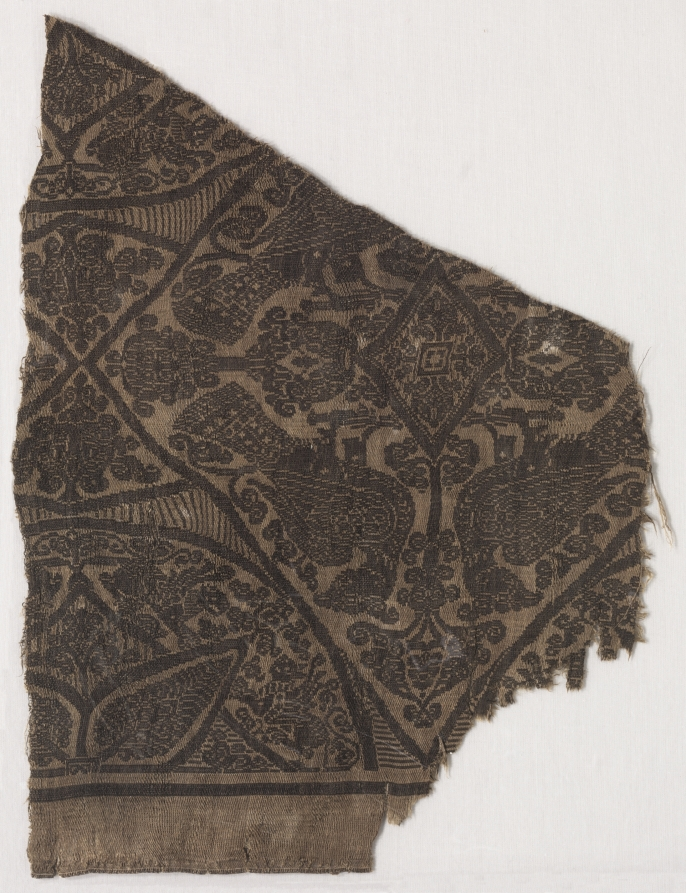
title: Fragment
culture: Iran or Iraq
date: 1420–1955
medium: Silk: compound twill weave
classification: Textile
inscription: sana'ahu 'Ali bin Yusuf bin al-Marzuban al-...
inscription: li-yasta 'malhu al-amir al-ajall Qawam al-Mulk Abu 'Abd Allah 'Isa bin Ibrahim al-Harithi atala Allah fi al-m'ali baqa['a]hu wa-harasa fi iqtifa[']al-makarim fana['a]hu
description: The weave provides different design for each side. On the front, the overall lozenge pattern has alternating rows of ornamented ovals and diamonds. The large diamonds have a large four-leaved motif super-imposed over a diamond with trees in each corner. The foliate ground with four pairs of opposed griffins fills the interspaces to the oval border. The diamonds have two opposed pairs of birds each flanking a Tree of Life and standing on a plant motif; these enclose a smaller central diamond with trees in each corner and a central square. On the reverse, the plain ground of natural tan has two brown bands in large and small Kufic inscription.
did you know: The design is at right angles to warp.